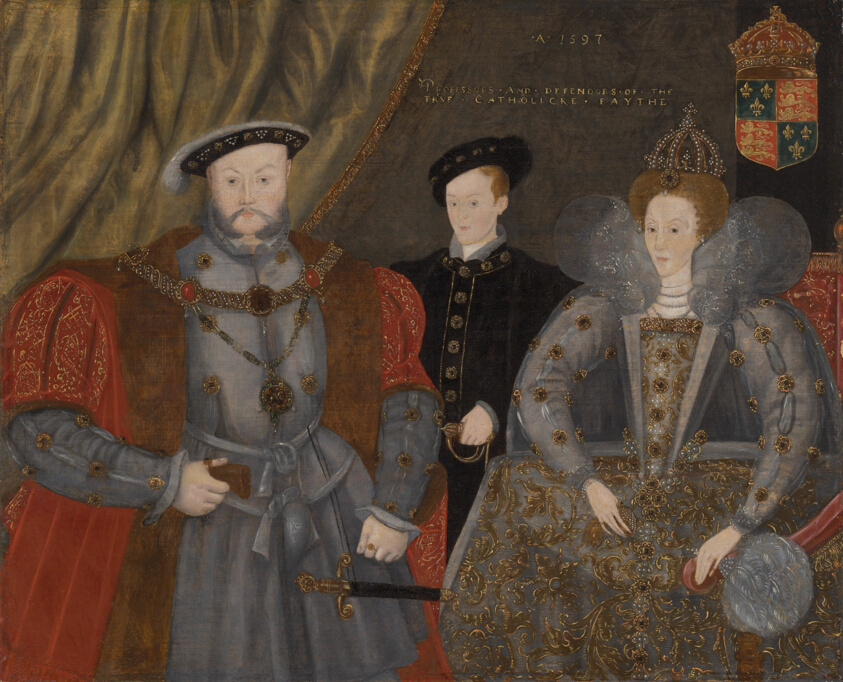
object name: Painting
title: Henry VIII, Elizabeth I, and Edward VI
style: 16th Century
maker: English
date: 1597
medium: Oil on panel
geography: England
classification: oil on panel; paint; portrait; painting; european painting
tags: portrait, gold (color), pearls, fans, swords, chair, drapery, dresses, jewelry, fashion, England, English, power, crowns, nobility, queens, king, royal, portraits: European subject